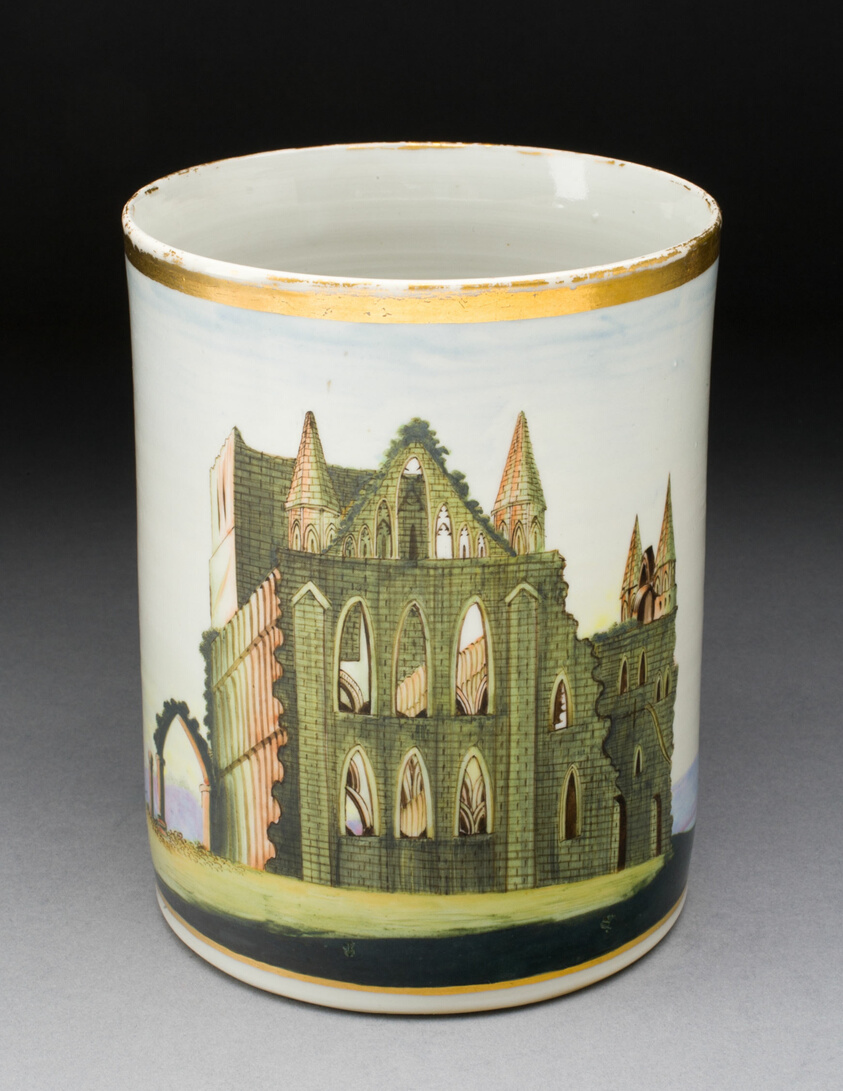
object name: Ceramics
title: Tankard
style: chinese export, Chinese (culture or style), East Asian, asian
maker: China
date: c. 1785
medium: Hard-paste porcelain with polychrome enamels and gilding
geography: Jingdezhen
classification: drinking vessel; chinese export porcelain; porcelain; european decorative arts; ceramics